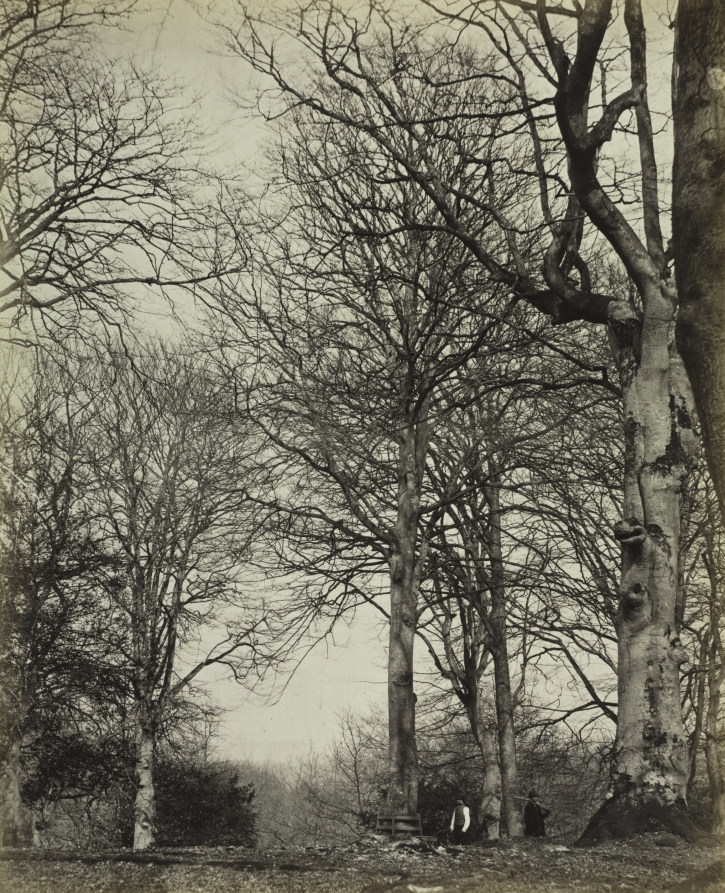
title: Queen Adelaide's Beech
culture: England, 19th century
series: The History of Windsor's Great Park and Windsor Forest by William Menzies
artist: James Sinclair, 14th Earl of Caithness (British, 1821–1881)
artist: or William Bambridge (British, 1819–1879)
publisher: Longman, Green, Longman, Roberts & Green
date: before 1864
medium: albumen print from wet collodion negative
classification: Photograph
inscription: Printed in black ink on recto: "QUEEN ADELAIDE'S BEECH. / HEIGHT 50 FEET. CIRCUMFERENCE 8 FEET 6 INCHES / PROBABLY AGE 140 YEARS. / And on my trunk's surviving frame / Carv'd many a long forgotten name. / CAMPBELL's Beech Tree's Petition.